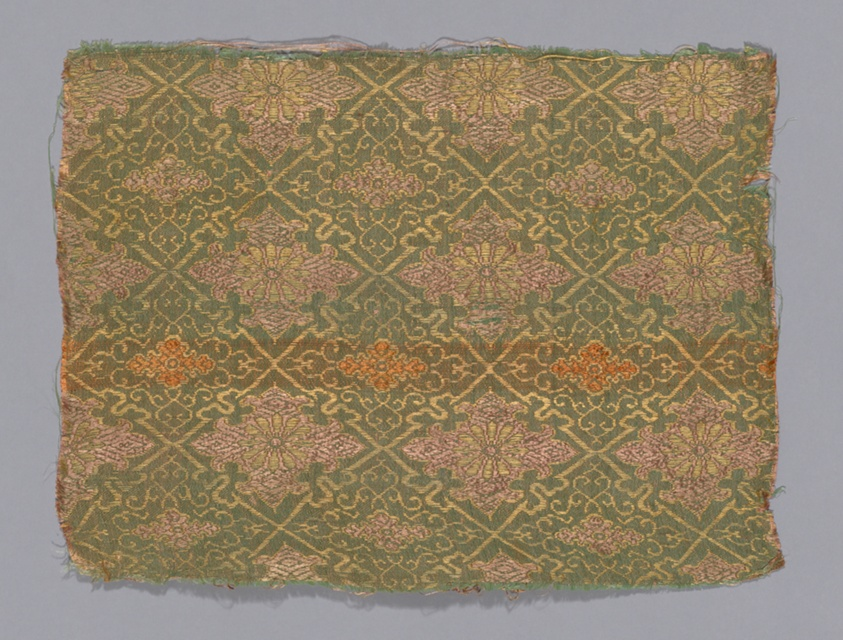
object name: Textile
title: Fragment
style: edo (japanese period)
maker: Japan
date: Edo period (1615–1868), 1675/1725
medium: Plain compound satin, silk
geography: Japan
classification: textile; weaving